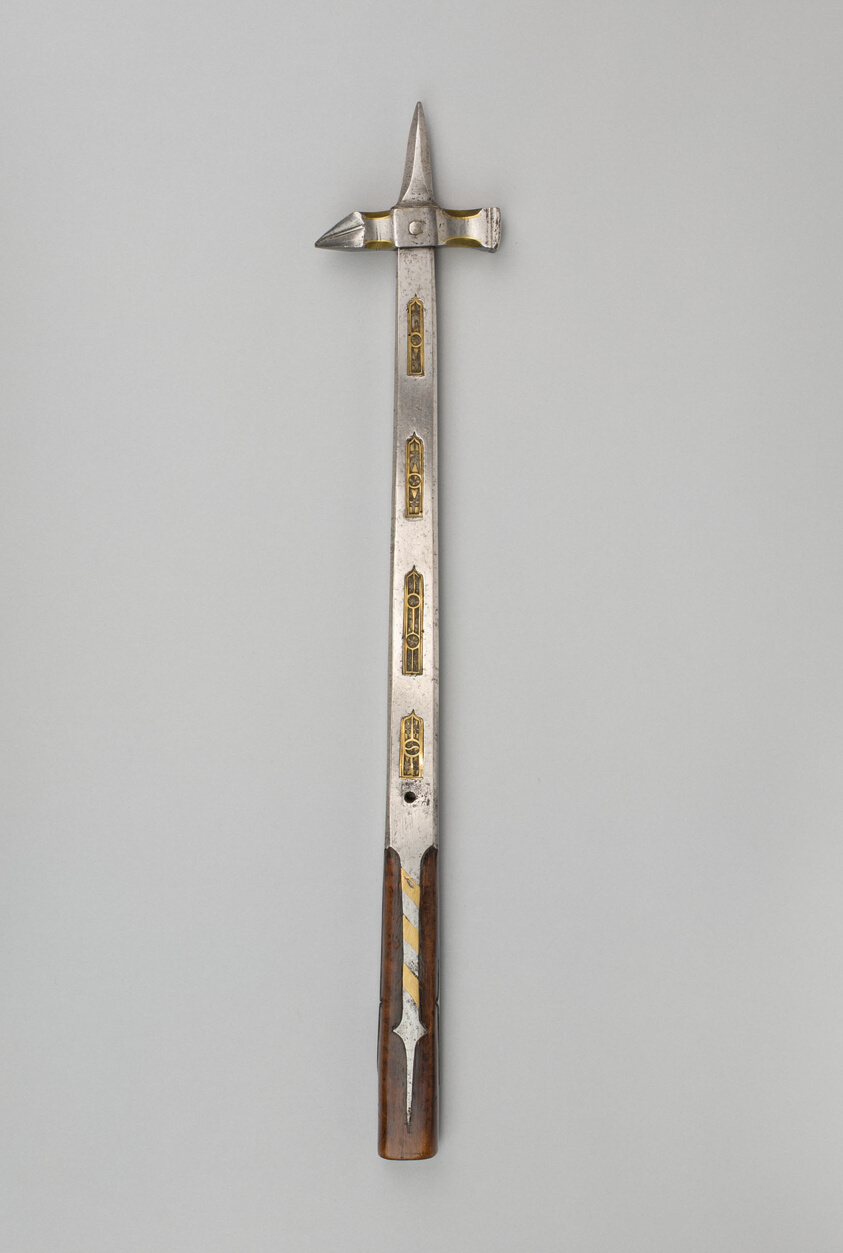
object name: Arms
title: War Hammer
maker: German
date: 1490/1510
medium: Steel, iron, brass, and beechwood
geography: Germany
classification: shafted weapon; arms; arms and armor